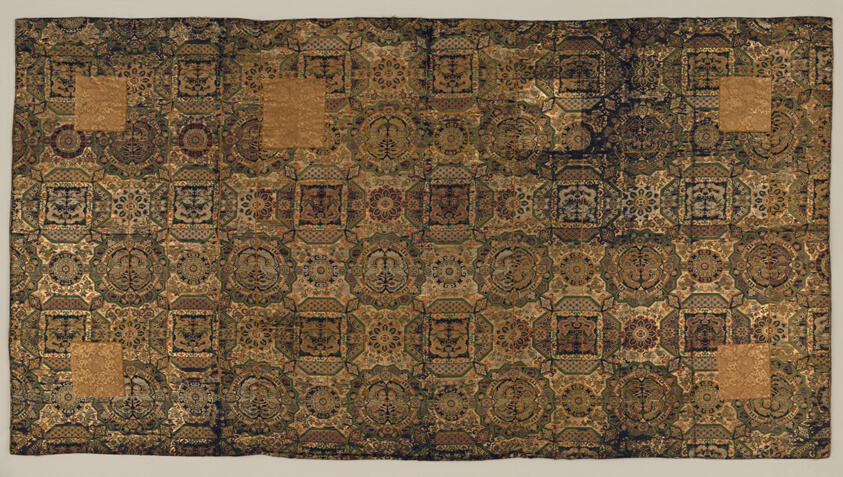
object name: Textile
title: Kesa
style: edo (japanese period)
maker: Japan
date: 18th century, Edo period (1615–1868)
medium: Silk and gilt-paper strip; twill weave with secondary binding warps and supplementary patterning wefts, with couched plied silk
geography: Japan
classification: textile; liturgical - buddhist; costume; weaving